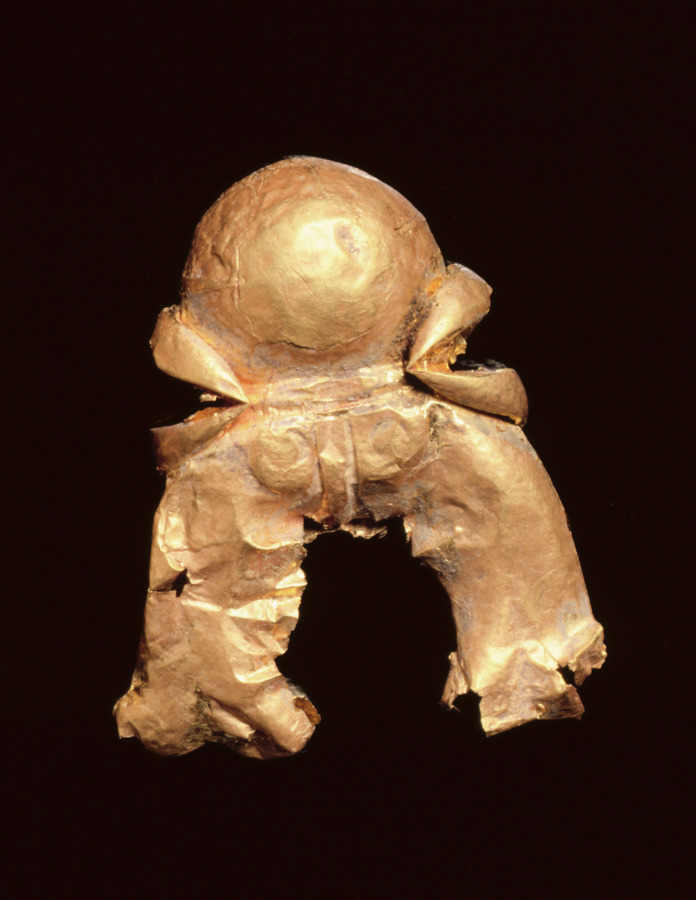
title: Gold Piece in Shape of Triratna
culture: India, Shunga period (185–78 BCE)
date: 185–72 BCE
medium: gold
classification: Jewelry